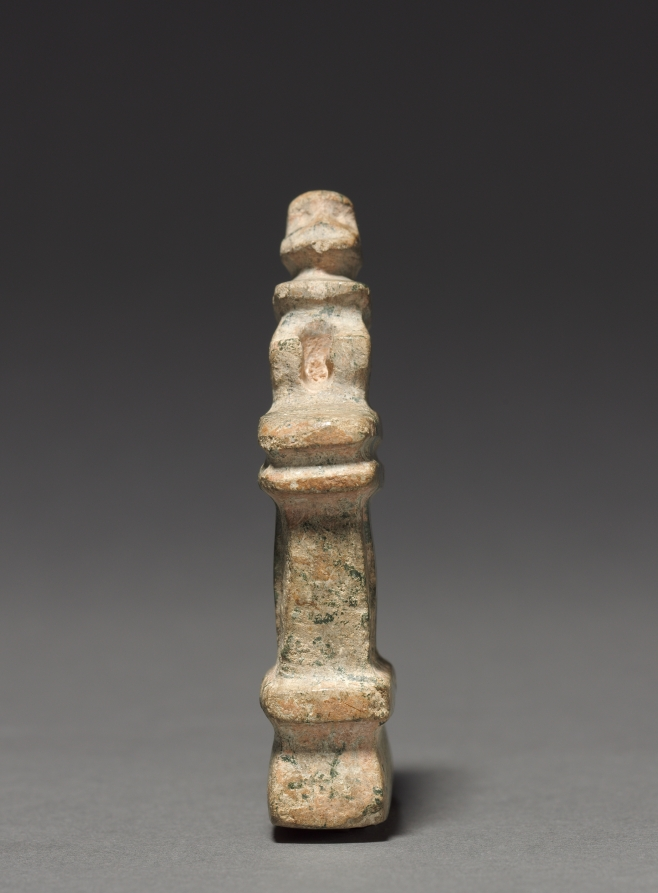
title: Architectural Model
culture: Mesoamerica, Mexico, Guerrero, Mezcala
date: 100 BCE–300 CE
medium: serpentine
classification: Sculpture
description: The Mezcala style takes its name from a river in its homeland, the Guerrero region of western Mexico. The style is known for small-scale stone sculptures including architectural “models” characterized by sleek abstraction. Because comparisons to actual architecture in the Mezcala region are scarce, it is not known whether the models refer to temples, houses, or underground funerary structures.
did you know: The Mezcala style was first recognized and defined in 1956.